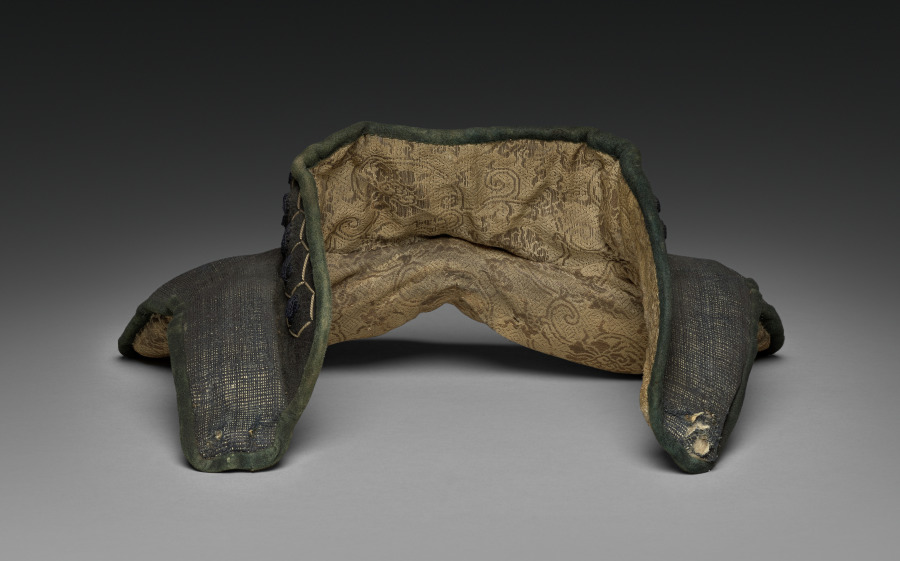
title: Collar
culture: Japan, Edo period (1615–1868)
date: 1600s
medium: Iron, lacquer, textile (silk)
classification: Arms and Armor